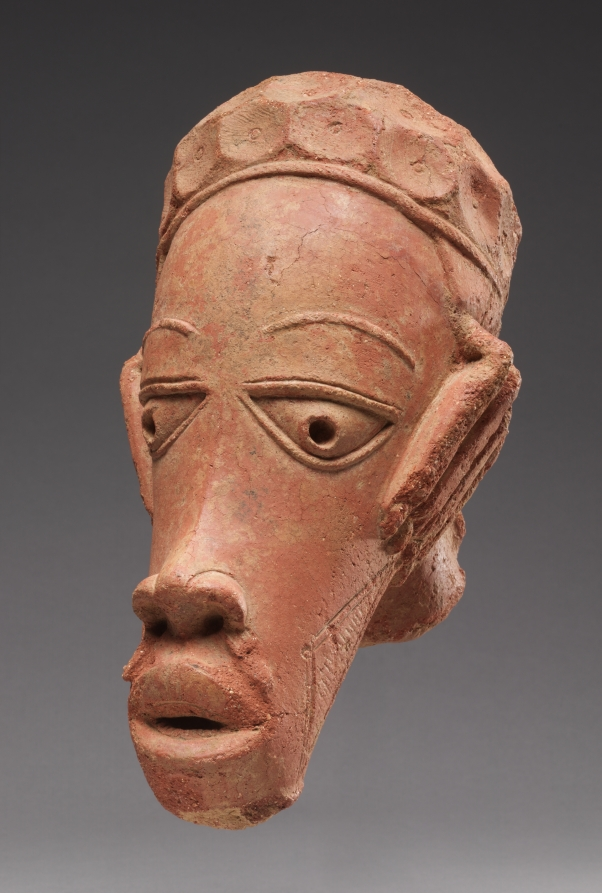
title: Head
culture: Africa, West Africa, Nigeria, Nok-culture style region, unknown female ceramicist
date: thermoluminescence date 20–620 CE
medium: terracotta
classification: Sculpture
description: More than 500 such sculptures—often full figures with elaborate hairstyles and jewelry— have been found in central Nigeria. Named after a discovery site, Nok culture (500 BCE–200 CE or 1500–1 BCE) produced the earliest large figurative artworks in Africa outside of Egypt. Little was known about their social context, as they were first found in mining deposits in the 1920s. Archaeological excavations conducted in the 2000s by a German-Nigerian team suggest that many sculptures were deliberately broken and placed under pavements and in pits, indicating ritual practice. Male-centered art histories presumed men made these figurative sculptures; however, they incorporate building and firing techniques practiced only by women.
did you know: This complete head’s bold modeling, deliberate asymmetry, and sensitive expression make it one of the finest known examples of Nok sculpture.